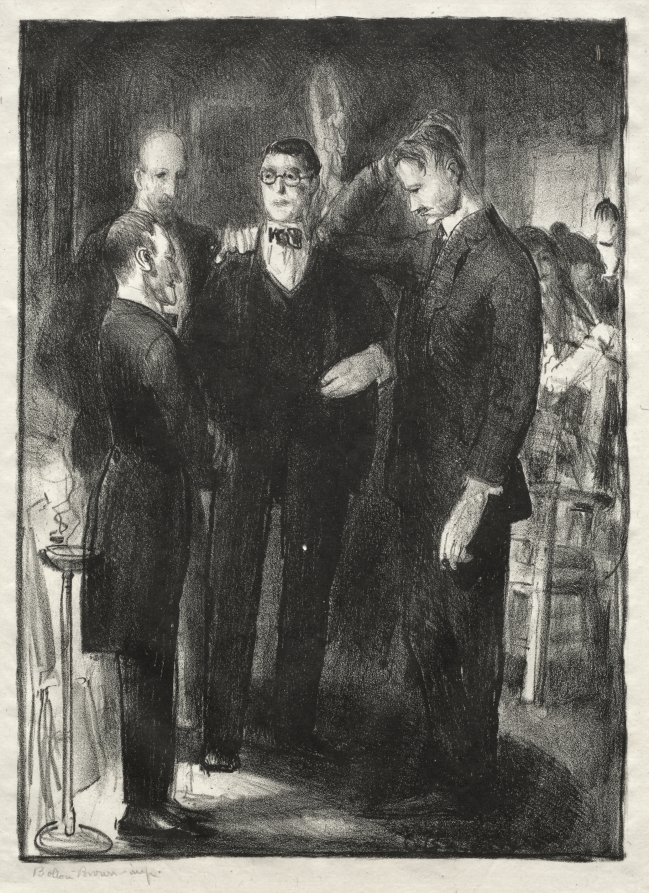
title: Four Friends, second state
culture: America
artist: George Bellows (American, 1882–1925)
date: 1921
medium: lithograph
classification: Print